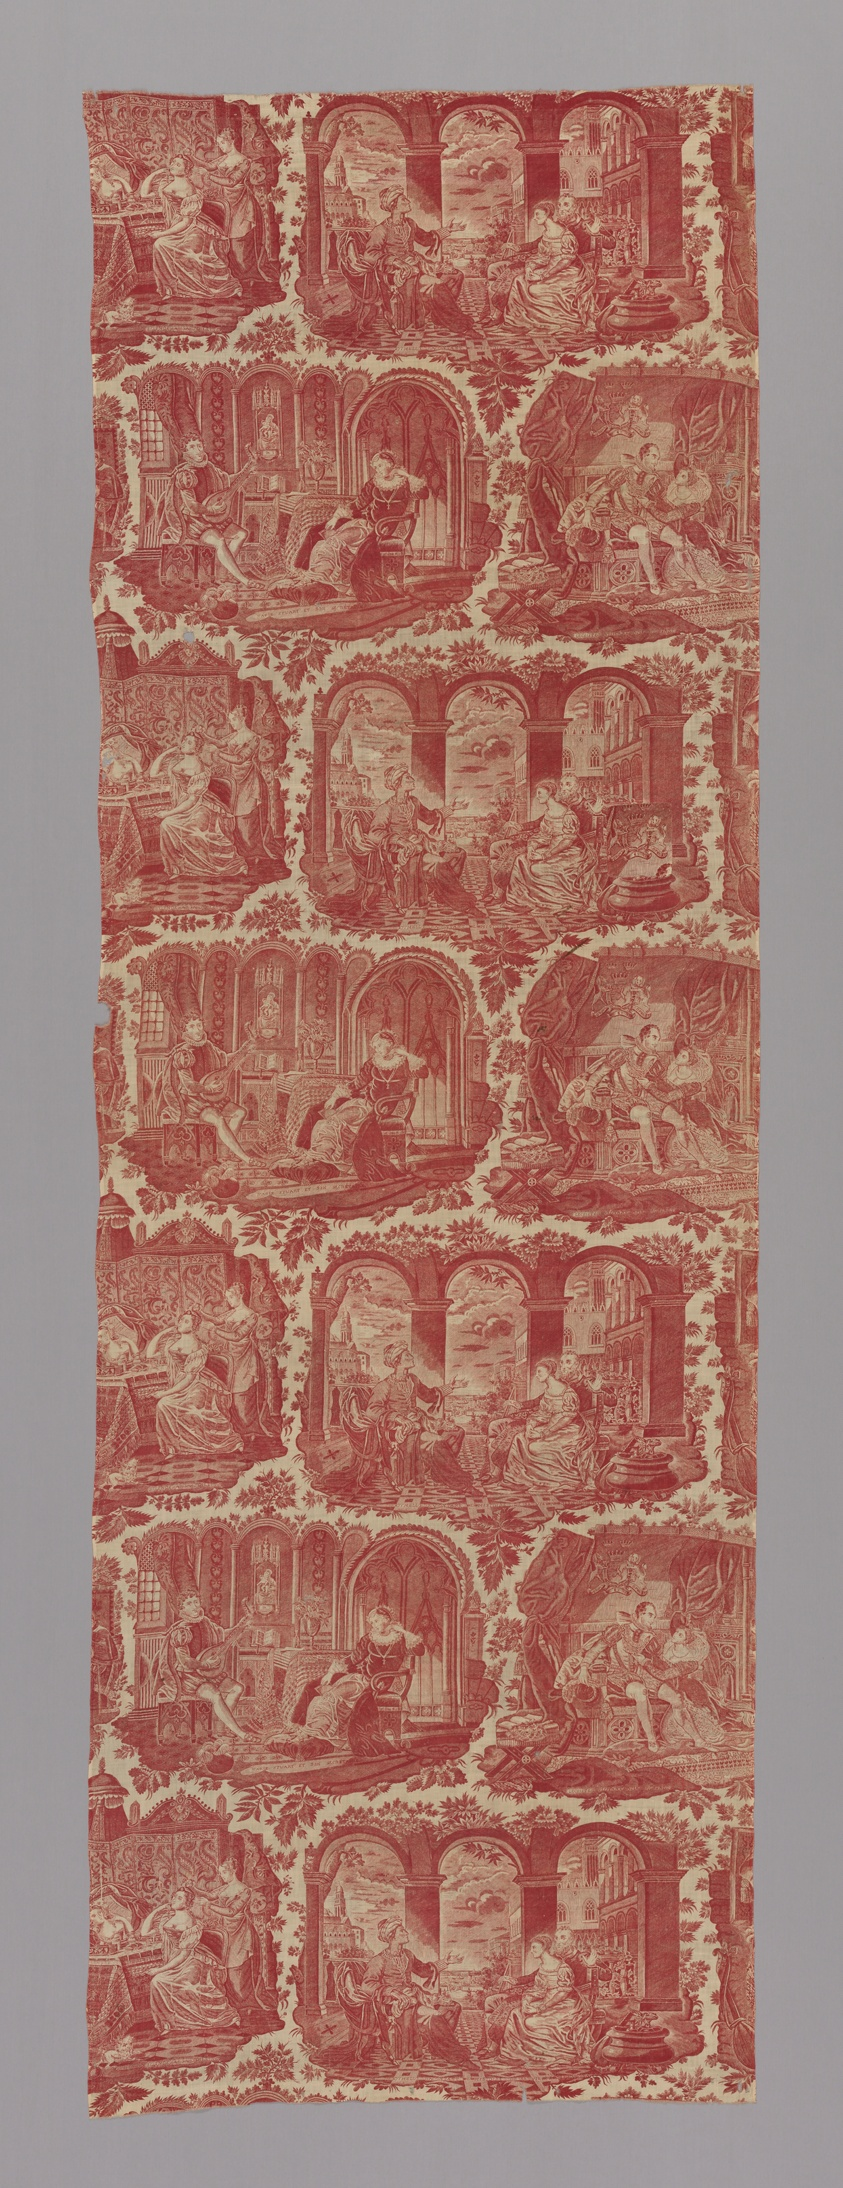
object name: Textile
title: Furnishing Fabric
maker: Designed by Philippe Wyngaert (Flemish, active c. 1820) after engravings by Jean-Pierre-Marie Jazet (French, 1788-1871) and paintings by Henri Jean-Baptiste Victoire Fradelle (French, 1778-1865); France, possibly Alsace or Bolbec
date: 1827-40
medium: Cotton, plain weave; copperplate printed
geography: France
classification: weaving - printed; printed textile; textile; furnishing textile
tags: people, women, shakespeare, musical instruments, music, mirror, literature, chair, Óthello, dogs, columns